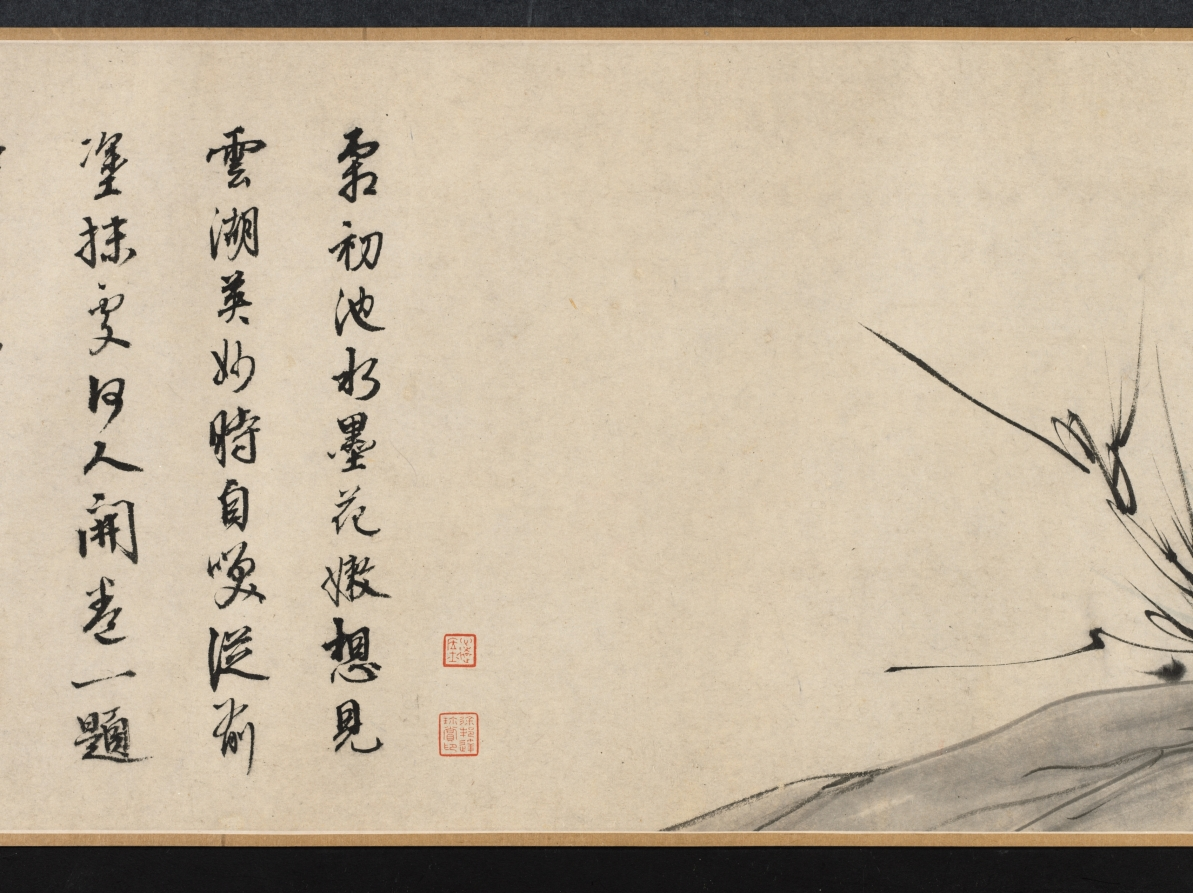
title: Chrysanthemums and Cabbage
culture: China, Ming dynasty (1368–1644)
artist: Tao Cheng (Chinese, active c. 1471–after 1502)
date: c. 1486 or before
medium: handscroll, ink and slight color on paper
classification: Painting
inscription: Artist's seal at beginning of painting: Yun hu 雲湖. Title by Wang Wenzhi 王文治 (1730–1802), date 1756. 2 seals of Wang Wenzhi 王文治 (1730-1802); 3 seals of Ku Yün (n. d.)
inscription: Section A (Chrysanthemums): 1 poem and 1 seal of Zhang Yuanzhen 張元禎 (1437–1507) - Jinshi, 1461; 1 poems and 3 seals of Ni Yue 倪岳 (1444–1501) - Jinshi, 1464; 1 poems and 2 seals of Zhao Xiang 趙祥 (life dates unknown) - Jinshi, 1469; 1 poems and 1 seals of Wu Xixian 吳希賢 (1437–1489) - Jinshi, 1464; 1 poems and 1 seals of Lü Chang 呂㦂 (1449–1511) - Juren, 1471; 1 poems and 3 seals of Fu Han 傅瀚 (1435–1502) - Jinshi, 1464; 1 poems and 1 seals of Feng Jue 馮珏 (life dates unknown) - Jinshi, 1478.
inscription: Chrysanthemums section, poem 1, by Zhang Yuanzhen 張元禎 (1437–1507): Several bushes of chrysanthemums grow in front of the Five-Willow Cottage,/ The yellow ones are really yellow and the white ones white./ This affable and decent fellow, young in years and unsophisticated,/ Has snapped one of the branches to dip in ink. (The Five-Willows Cottage was the home of the poet Tao Qian 陶潛 (Tao Yuanming 陶淵明, AD 365-427).) Chrysanthemums section, poem 2, by Ni Yue 倪岳 (1444–1501): Where at the Eastern Fence can you grieve for the Soul of the Xiang River?/ A man of upright character is mourned within the traces of ink./ White jade with a slight flaw would be a grievance forever,/ Later men should understand why even the roots of the flowers are washed. (Eastern Fence refers again to the poet Tao Qian 陶潛, while the Soul of the Hsiang River refers to the poet Qu Yuan 屈原 (c. 340–278 BC).) Chrysanthemums section, poem 3, by Zhao Xiang 趙祥 (life dates unknown): A clump of chrysanthemum grows in front of the bamboo pavilion,/ The winds of many autumns have blown since we parted beyond the river./ Straining wine through the official's cap of Tao [Qian] to prolong autumn's pleasures,/ The mists and clouds of ten thousand miles belong to the intoxicated. Chrysanthemums section, poem 4, by Wu Xixian 吳希賢 (1437–1489): It is a different spring if mulberry is planted during the latter part of the year,/ The dust of the world originally did not drop on clothing./ Who spills out ink under the Eastern Fence/ And paints so freely this portrait of chrysanthemums for the venerable Sir Tao? Chrysanthemums section, poem 5, by Lü Chang 呂㦂 (1449–1511): This full tray of ink for painting [flowers] at the Eastern Fence;/ Their whiteness or yellowness is not essential in capturing their beauty./ I don't have to go to Jiangnan to see them myself./ At my old house grow two or three branches. Chrysanthemums section, poem 6, by Fu Han 傅瀚 (1435–1502): Who daubed autumn flowers with ink/ As if they were dark dew on a branch tip only vaguely seen at evening?/ After the lazy clouds disperse, no one paints;/ A certain unconventionality pervades this painting. Chrysanthemums section, poem 7, by Feng Jue 馮珏 (life dates unknown): To satisfy his hunger, [the chrysanthemums] have at times entered the poetry of Qu Yuan;/ Taking up the wine cup, it felt close to Tao Qian./ [With them I am like] a lonely root sustained by deep water/ Or an old man to whose hair the color of youth returns.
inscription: Section B (Cabbage): 1 poem and 1 seal of Cai Qi 蔡圻 (life dates unknown) - degree information not known; 1 poems and 3 seals of Ni Yue 倪岳 (1444–1501) - Jinshi, 1464; 1 poem and 3 seals of Jiao Fang 焦芳 (1436–1517) - Jinshi, 1464; 1 poem and 3 seals of Li Dongyang 李東陽 (1447–1516) - Jinshi, 1464; 1 poems and 1 seals of Wu Xixian, signed “Xixian” 吳希賢 - Jinshi, 1464; 1 poems and 3 seals of Fu Han 傅瀚 (1435–1502) - Jinshi, 1464; 1 poems and 1 seals of Lü Chang 呂㦂 (1449–1511) - Juren, 1471; 1 poems and 2 seals of Zhao Xiang 趙祥 (life dates unknown) - Jinshi, 1469; 1 poems and 1 seals of Feng Jue 馮珏 (life dates unknown) - Jinshi, 1478.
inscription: Cabbage section, poem 1, by Cai Qi 蔡圻 (life dates unknown): The ink splashes are fresh from a frosty brush dipped in pond water;/ I can visualize that time when Yunhu 雲湖 [Tao Cheng] first showed his talents./ I lament the places where I scribbled before,/ Who would open them to inscribe a poem? (The first line is an allusion to the famous Jin dynasty calligrapher Wang Xizhi 王羲之 (AD 303-361), who practiced calligraphy so diligently at the edge of a pond that the water turned black with ink.) Cabbage section, poem 2, by Ni Yue 倪岳 (1444–1501): After rain the vegetables begin to grow;/ How are the colors of the masses lately!/ Once you get used to them, the tastiest parts are the ends of the roots;/ I don't know if they can be used for "seasoning soup." ("Seasoning soup" is an allusion to the statesmanship of a chief minister.) Cabbage section, poem 3, by Jiao Fang 焦芳 (1436–1517): This crop of purple stalks and green leaves is late and irregular;/ Now the rainy season is over for the Eastern Garden./ All the nobles nowadays dine on meat;/ Who of them knows the flavor of this [cabbage]. Cabbage section, poem 4, by Li Dongyang 李東陽 (1447–1516): It's always helped the honest man to sober up after drinks./ I intend to go to the deepest part of the stream-crossed garden/ To refresh myself in the fragrance and dew of evening. Cabbage section, poem 5, by Wu Xixian 吳希賢 (1437–1489): After rain, the white silk is filled with fragrant vegetables;/ How many times this happens in Mr. Tao's paintings./ On whom will you depend to present a memorial to the ruler?/ Don't let this color emerge on the faces of the people. (The last line is meant as a warning to officials: the color of the vegetables (green) may be pleasing in itself, but when it emerges on the faces of the starving poor, it signifies a badly governed world.) Cabbage section, poem 6, by Fu Han 傅瀚 (1435–1502): For twenty years I have feasted on the excellent mutton of an official;/ Yet I talk and dream about the garden and its vegetables./ Do not merely say it is good to chew the root of the cabbage--/ You must taste to understand what poverty is. Cabbage section, poem 7, by Lu Chang 呂㦂 (1449–1511): The capital is never a place for an apprentice in the "garden of scholarship."/ Who would write about gardens and vegetables on an examination paper?/ I've walked throughout the country in spring;/ Make sure the people don't show this color. Cabbage section, poem 8, by Zhao Xiang 趙祥 (life dates unknown): After a wash of rain, the spring garden is still in order;/ The flavor [of the cabbage] is more suitable with a small drink and the hum of a tune./ The rich and powerful in their mansions consume dish after dish of meat;/ Vegetarian food is known only by the scholars. Cabbage section, poem 9, by Feng Jue 馮珏 (life dates unknown): A new cabbage is nourished with dew;/ It takes a long time to grow and mature./ The business of "seasoning the soup" is your responsibility;/ Better command the gardener to take care [of the cabbages]. trans. HK/LYSL/WKH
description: On an autumn day in Beijing, Tao Cheng had a gathering with a group of scholar-officials and created two paintings in a spontaneous, casual style. The first depicts chrysanthemums, slender bamboo stalks, and a rock in monochrome ink. Tao applied light colors for the second painting that depicts cabbage. Tao deliberately placed the images on the first sections of the paper so that his honorable guests could add their poetic inscriptions inspired by his imagery. In the first section to the right, all seven poetic inscriptions refer to the beloved poet and recluse Tao Qian (also called Tao Yuanming, AD 365–427) who was particularly known for his profound love for chrysanthemum flowers. Most of the inscriptions in the second section express sympathy for the poor, since cabbage is the main ingredient in their humble food. Taken together, the poems and paintings allude to the life and responsibilities of the scholar-official: the importance of both an upright character and a concern for the poor citizens in order to achieve good government.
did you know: Eminent calligrapher Wang Wenzhi 王文治 was only 27 sui when he wrote the title in 1756.